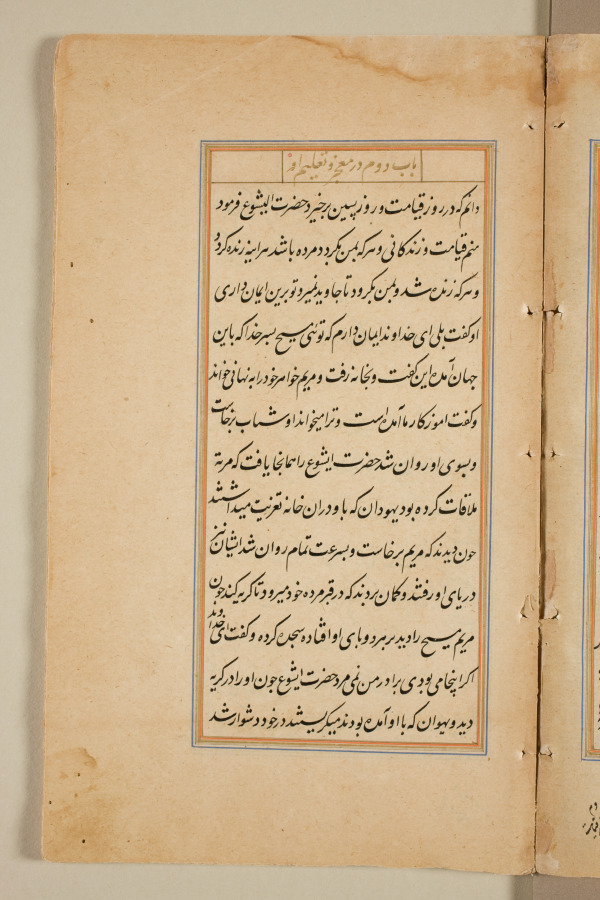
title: Text page from a Mirror of Holiness (Mir’at al-quds) of Father Jerome Xavier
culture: Mughal India, Allahabad, made for Prince Salim (1569–1627)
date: 1602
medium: Ink and gold on paper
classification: Manuscript